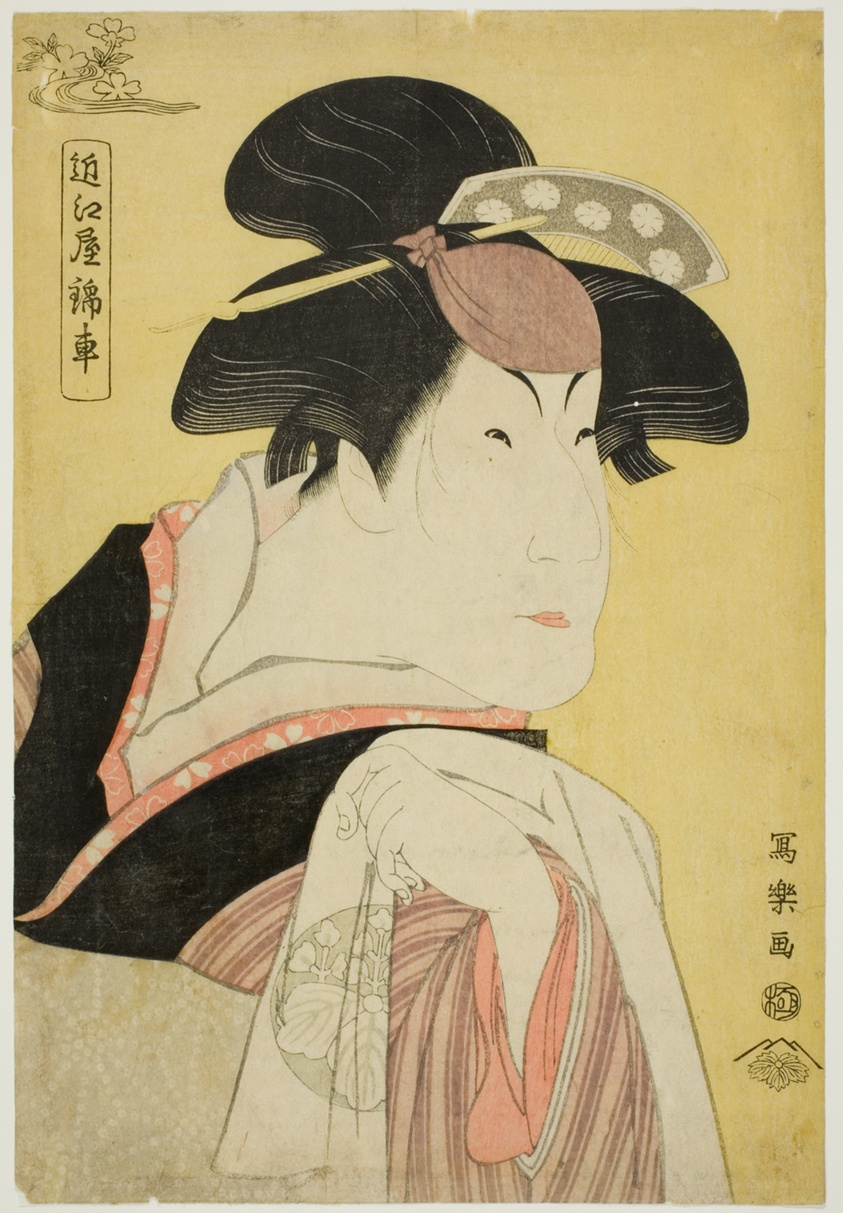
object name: Print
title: Omiya Kinsha (The actor Nakayama Tomisaburo I as Ohide, wife of Sazanami Tatsugoro [actually Teriha, younger sister of Abe no Sadato])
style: Japanese (culture or style)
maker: Toshusai Sharaku 東洲斎 写楽; Japanese, active 1794-95; Tsuta-Ya Juzaburo; Japanese, 1748-1797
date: 1794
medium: Color woodblock print; aiban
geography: Japan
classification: woodblock print; print; asian art